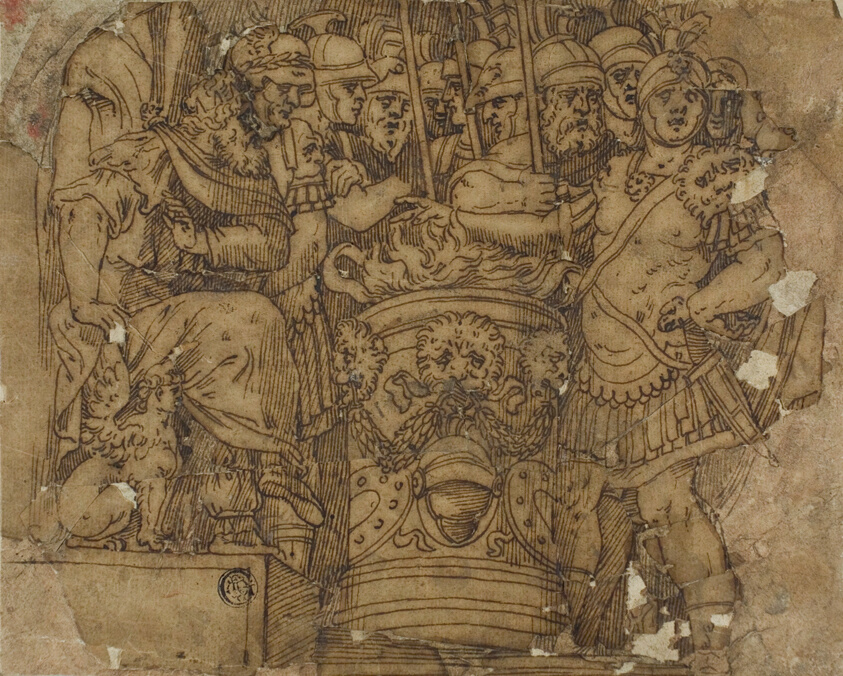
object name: Drawing and Watercolor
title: Mucius Scaevola Putting His Hand in the Flame before Porsenna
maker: After Polidoro Caldara, called Polidoro da Caravaggio; Italian, c. 1499-c. 1543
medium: Pen and brown ink, with brush and brown wash, on brown laid paper, laid down on tan laid paper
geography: Italy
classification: ink with wash; drawings (visual works); prints and drawing